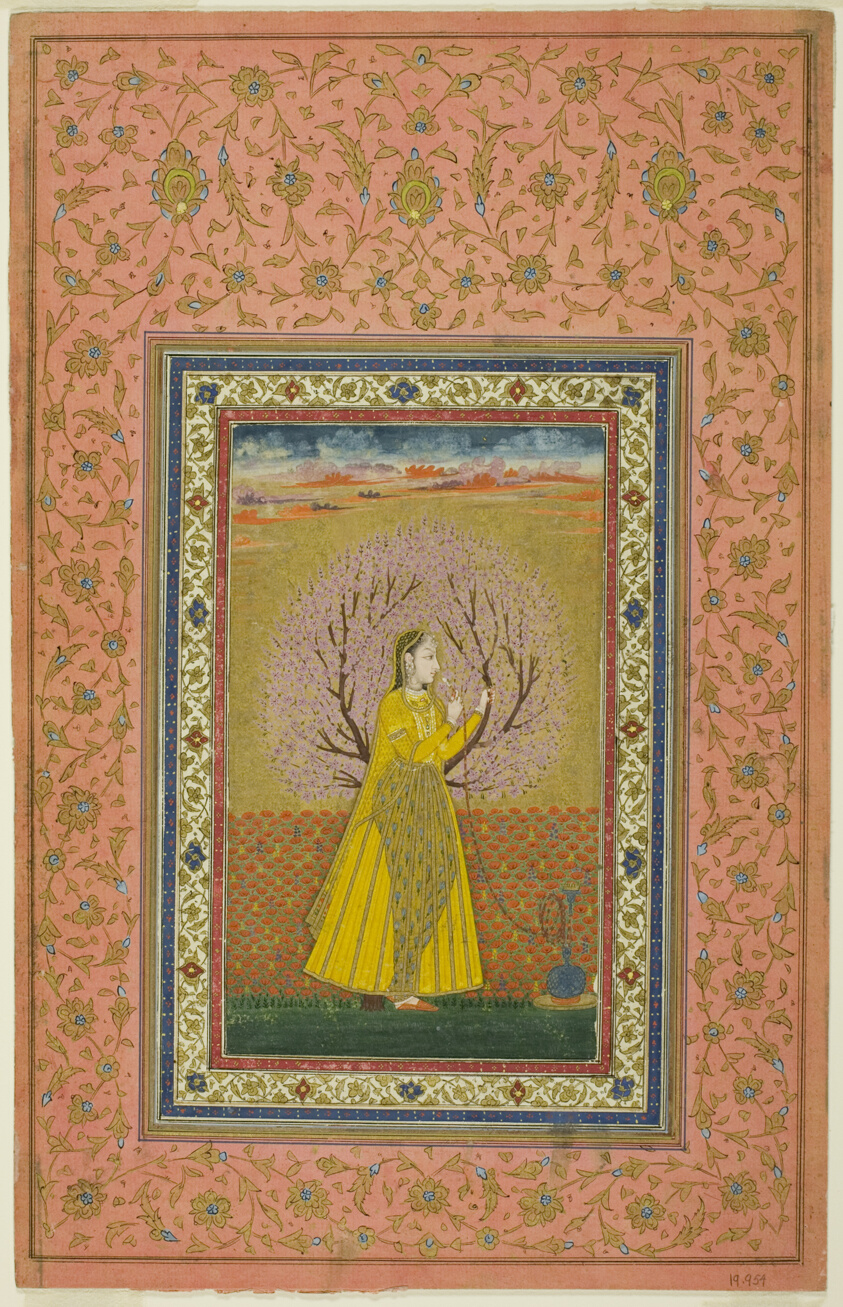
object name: Painting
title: Young Woman Smoking a Huqqa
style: South Asian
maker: India; Uttar Pradesh, Avadh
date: 18th century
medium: Opaque watercolor and gold on paper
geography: Avadh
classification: miniature painting; painting; asian art